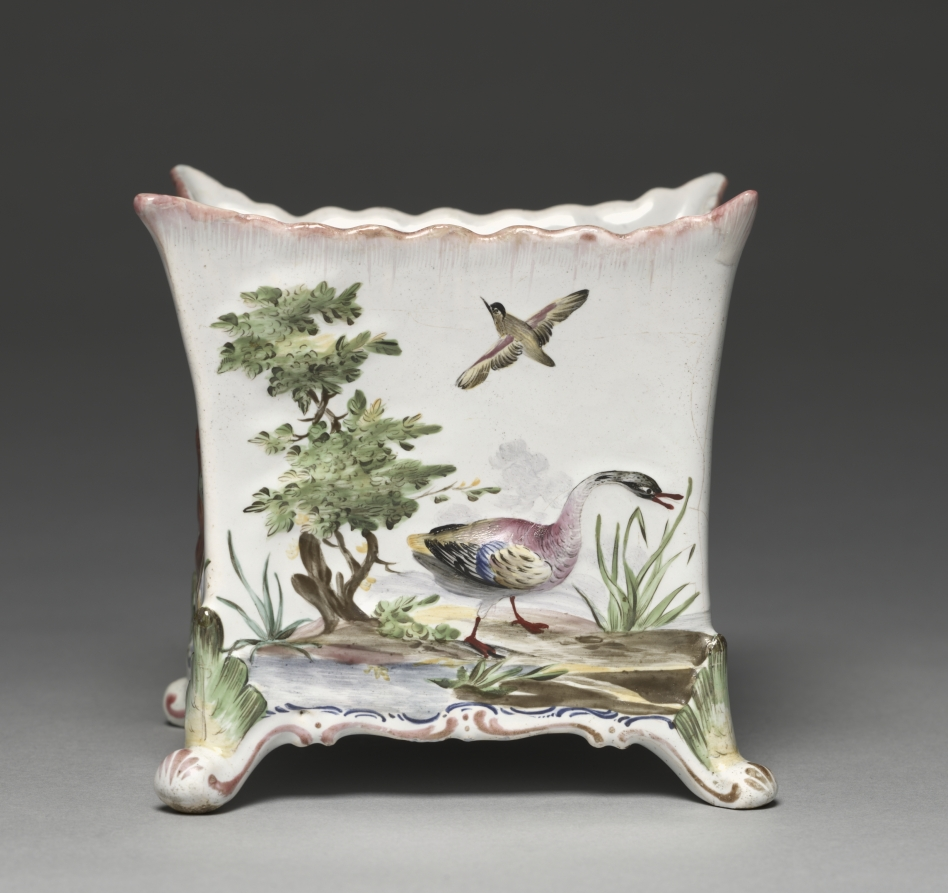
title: Flower Container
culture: France, 18th century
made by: Sceaux Factory (French, active 1748–66)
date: c. 1765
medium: faience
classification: Ceramic